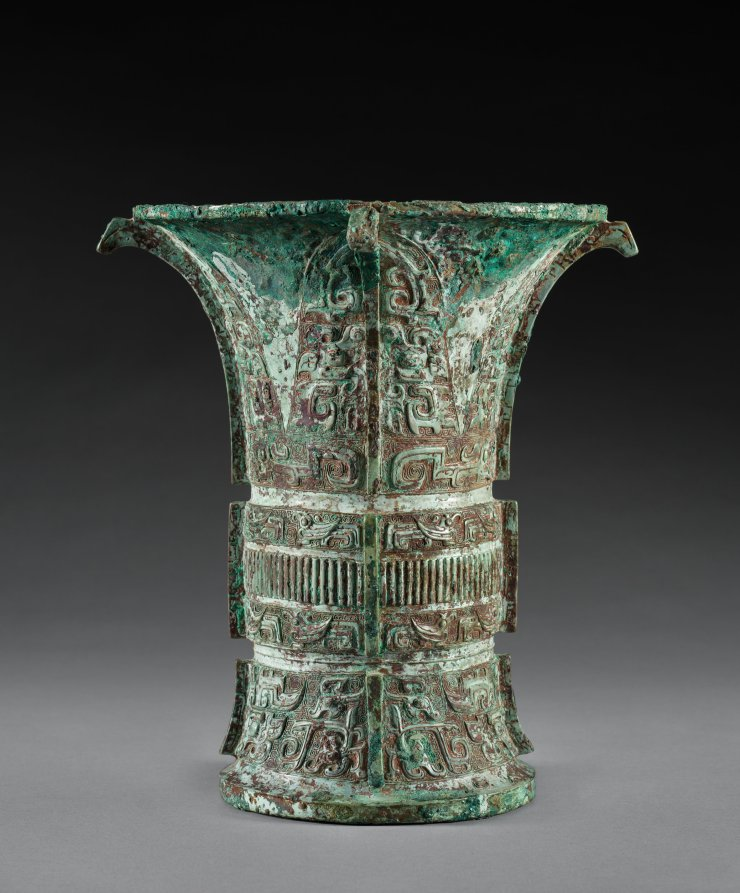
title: Wine Vessel (Fu Wu Zun)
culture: China, Western Zhou dynasty (c. 1046–771 BCE)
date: c. 1000–900 BCE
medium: bronze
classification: Metalwork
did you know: This vessel is decorated with dragons and taotie, a stylized monster face motif frequently found on ancient Chinese ritual bronzes.